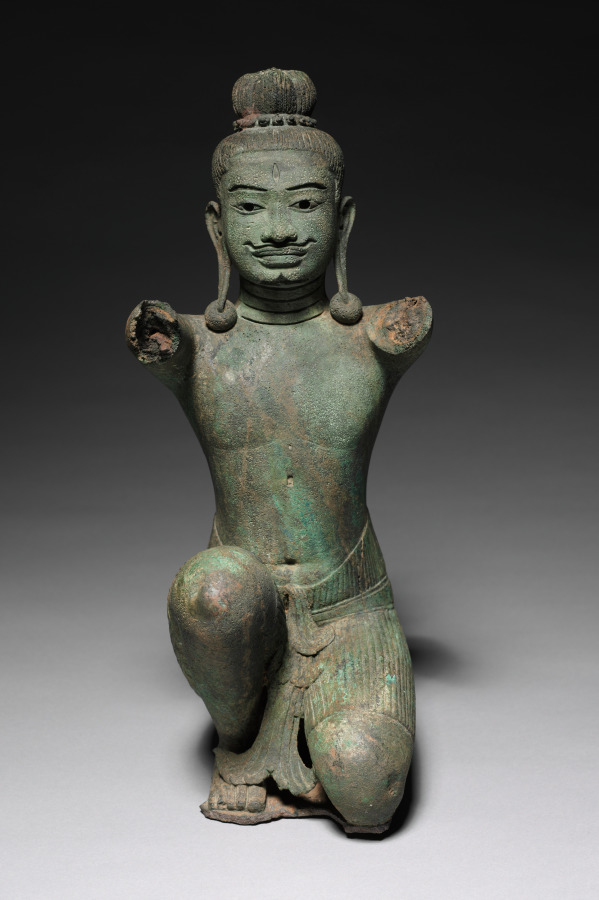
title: Kneeling Male Figure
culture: Cambodia, Angkor, Baphuon, Baphuon period, 1000s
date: 1010–80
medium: bronze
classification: Sculpture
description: The third eye in the forehead indicates that this figure identified himself with Shiva, but his kneeling stance with hands raised in a gesture of adoration indicates that he is a devotee of Shiva, who has taken on aspects of the god's physical appearance. The style of the lower garment with the low-slung belt is typical of work from the so-called Baphuon period of Khmer sculpture, like the stone standing image to the left. The eyes, eyebrows, moustache, and beard were once inlaid with silver.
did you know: This bronze figure was cast using the lost-wax (cire perdu) technique with the core armature inside.